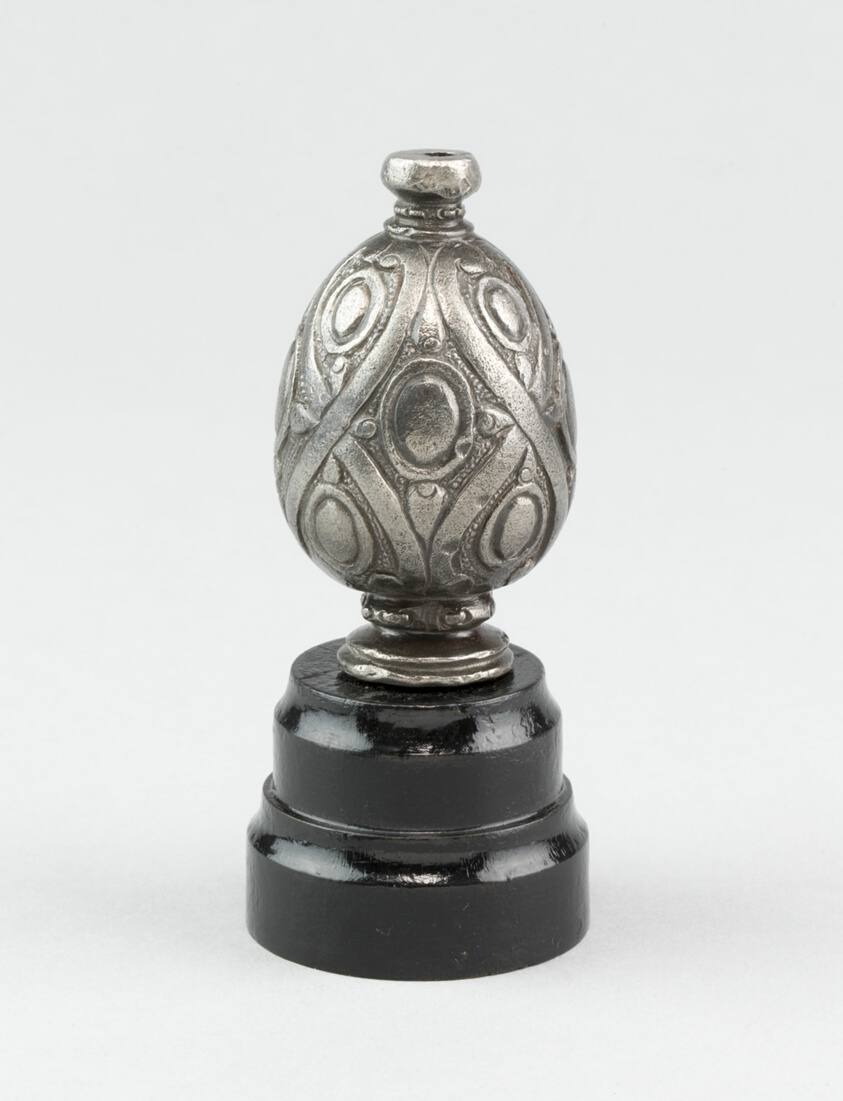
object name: Arms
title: Sword Pommel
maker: European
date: 1600/50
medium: Iron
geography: Europe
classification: edged weapon-sword; arms; arms and armor